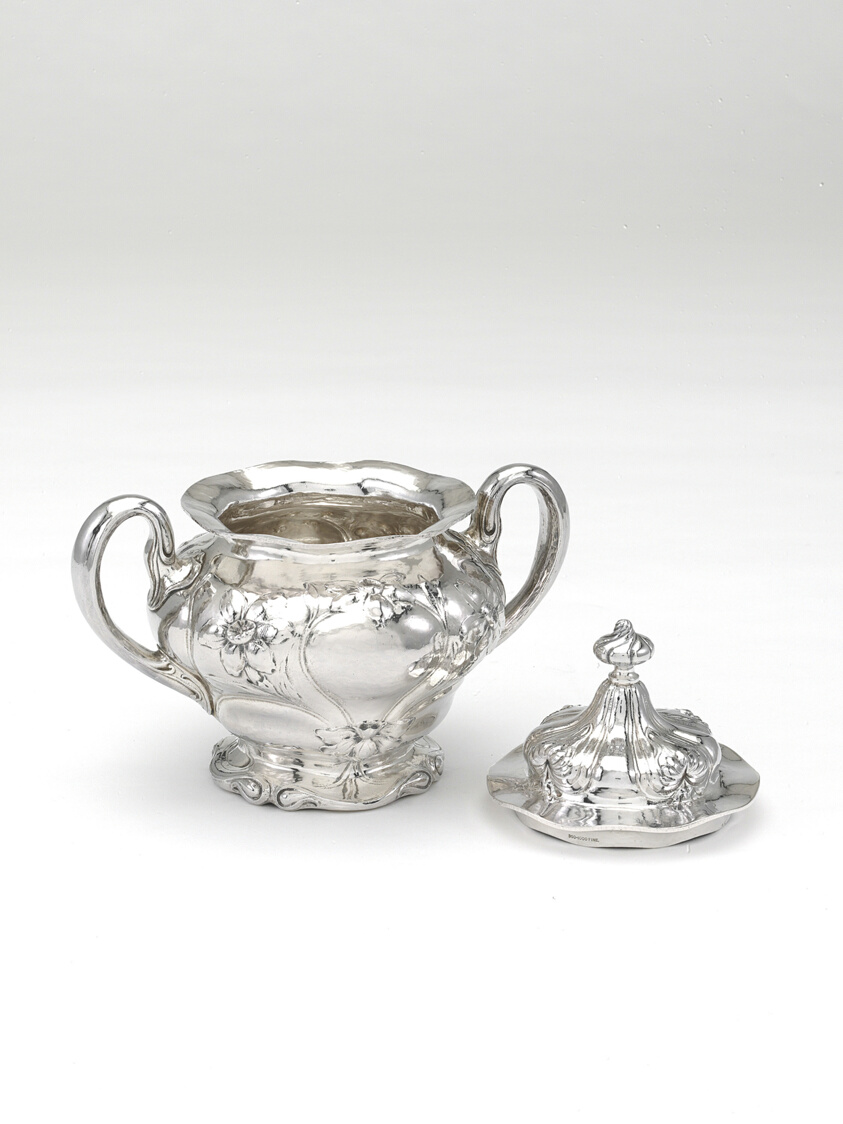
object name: Metalwork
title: Sugar Bowl and Lid (part of a set)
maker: Gorham Manufacturing Company (American, founded 1831); Providence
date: 1900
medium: Silver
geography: Providence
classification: sugar bowl; silver; american decorative arts; american arts; decorative arts